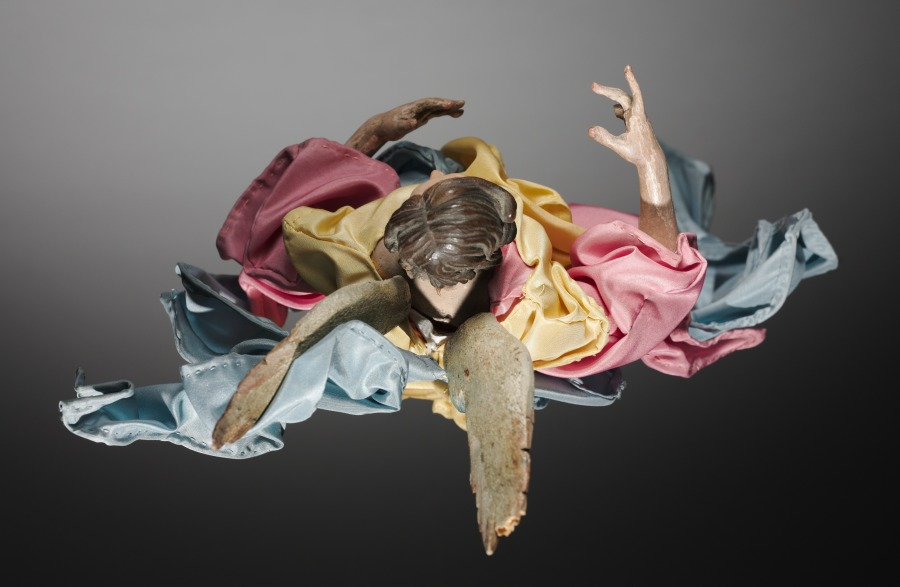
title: Figure from a Crèche: Angel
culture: Italy, Naples, late 18th-early 19th century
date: 1780–1830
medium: painted wood and terracotta with various textiles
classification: Sculpture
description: The practice of creating scenes of the Nativity for the home dates from the early 1700s in Italy, where people began to set up doll-like figures of about a foot or less in height. The custom was particularly popular in Naples around 1800, where crèche scenes (crèche means cradle, or crib) included many figures, whose heads and hands of painted terracotta, stuffed cloth bodies, and clothing adapted from contemporary local costumes gave them an amazingly realistic character. Representations of the birth of Jesus can be traced to the first few centuries of Christianity. Both living creatures and sculptural depictions of them were used from early times. By the late middle ages it was customary to create life-size figures of wood or stone, naturalistically painted, to represent the characters who participated in the events of Jesus's early life. These sculptures were then arranged in scenes illustrating one or both of the most important of these events, the Adoration of the Shepherds and the Adoration of the Magi-the three kings from the East who came to pay homage to the Christ child. Used in churches, these large figures were especially popular in Italy, Central Europe, Spain, and Portugal. This Object in Focus presentation was organized by Henry Hawley, Curator of Renaissance and Later Decorative Arts and Sculpture.